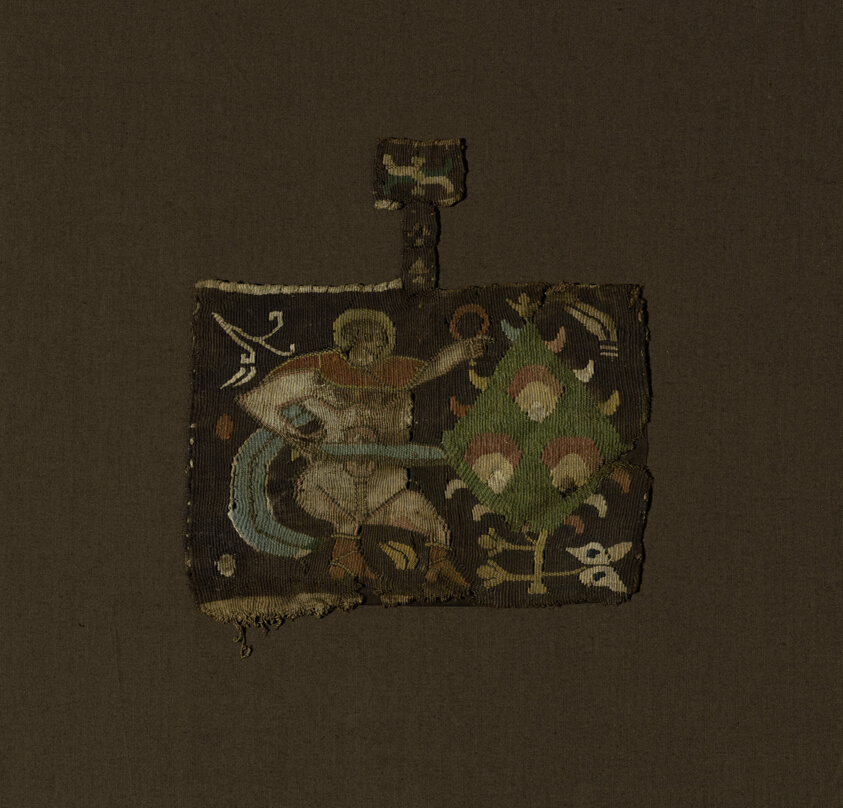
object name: Textile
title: Fragment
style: roman period (egyptian)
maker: Coptic (Egypt)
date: Roman period (30 B.C.– 641 A.D.)/Arab period (641–969), 6th/8th century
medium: Wool and linen, slit and dovetailed tapestry weave with eccentric wefts and wrapped outlining wefts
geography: Egypt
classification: textile; weaving